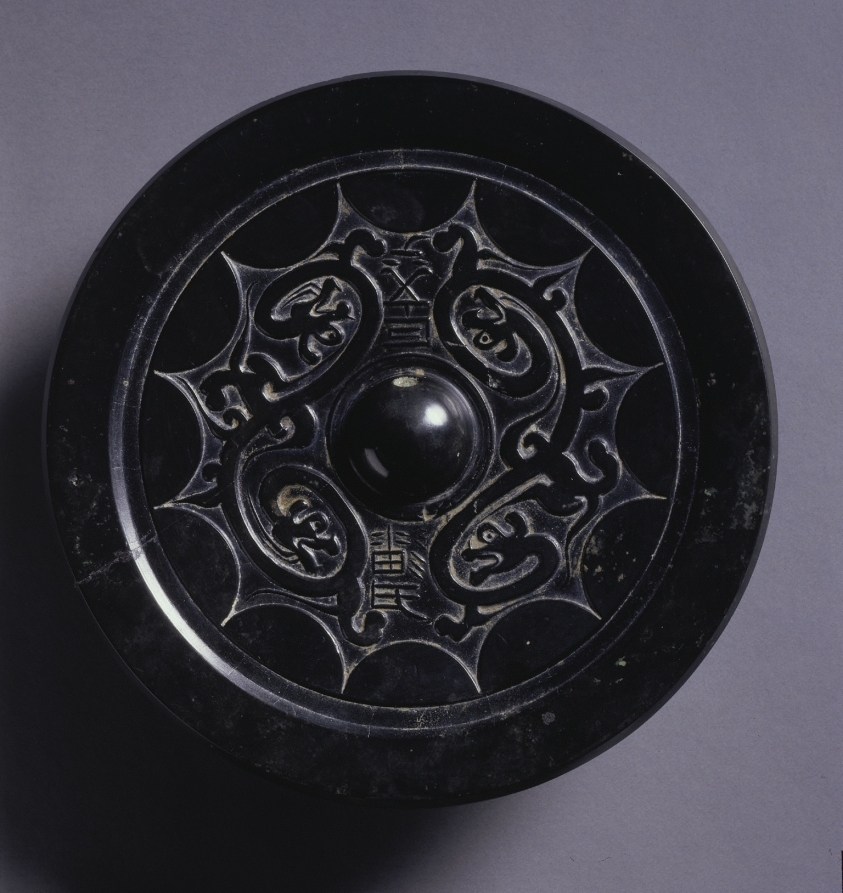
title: Mirror with Linked Arcs and Kui Dragons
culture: China, Eastern Han dynasty (25–220 CE)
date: 100s CE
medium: bronze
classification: Metalwork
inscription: 潘氏作鏡世少有，服者男分封候 ...宜孫子，樂無己。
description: Inscription: I, Pan, have produced the design.